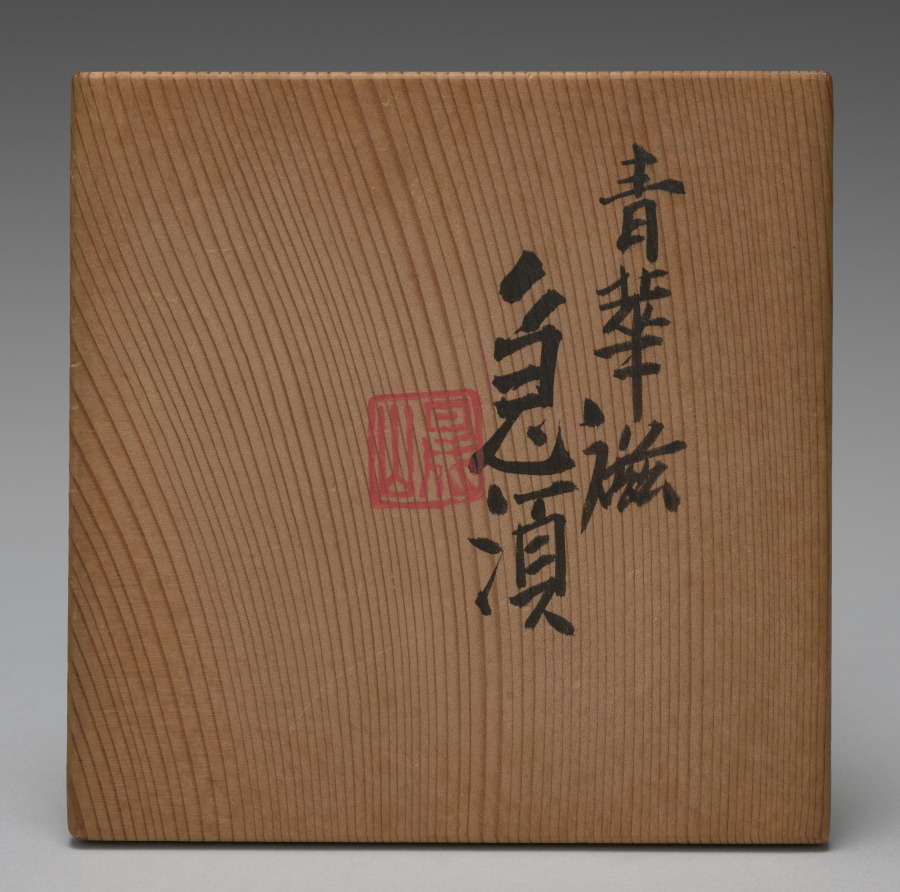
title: Teapot with Cherry at Night in Gion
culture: Japan, Meiji period (1868–1912)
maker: Seifū Yohei III (Japanese, 1851–1914)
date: 1893–1914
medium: Porcelain with underglaze blue and iron oxide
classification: Ceramic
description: This side-handled sencha teapot with the cherry tree has a nearly spherical shape, and its recessed lid has an ovoid knob. It has both blue and a purplish brown under the glaze for the blossoms and embers on one side, and the vertical calligraphy identifies the tree as a cherry tree at night in the Gion area of Kyoto. To the right of the tree, smoke billows from a small lantern fire in a basket suspended on a post. In terms of collecting history, a paper inserted into the box of Teapot with Cherry at Night in Gion is of interest. It is a flyer for Yamamoto Shōseidō, a shop (no longer extant) that sold fine Kyoto ceramics in Osaka.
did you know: This teapot features the Japanese theme of a blossoming cherry tree in the Gion area of Kyoto in underglaze blue and brown.